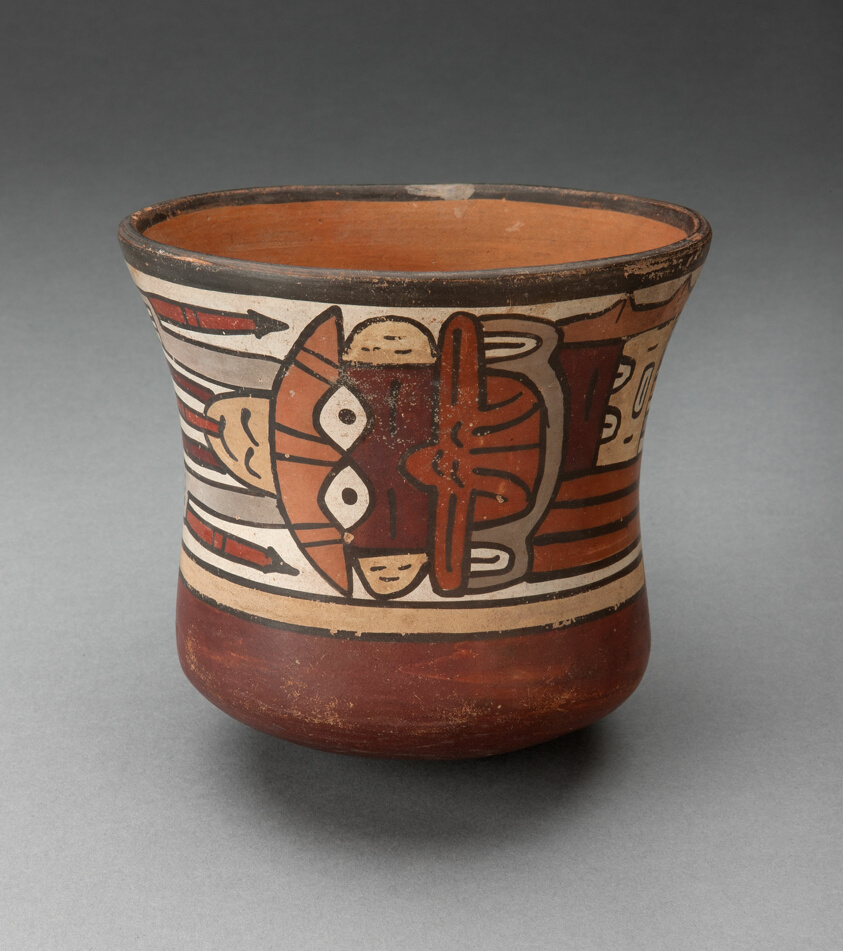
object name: Vessel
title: Short Beaker Depicting Costumed Ritual Performer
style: nazca, early intermediate period, Pre-Columbian, americas, Arts of the Americas, andean, andes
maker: Nazca; South coast, Peru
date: 180 BCE–500 CE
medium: Ceramic and pigment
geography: Nazca Valley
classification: earthenware; art of the americas; ceramics; vessel